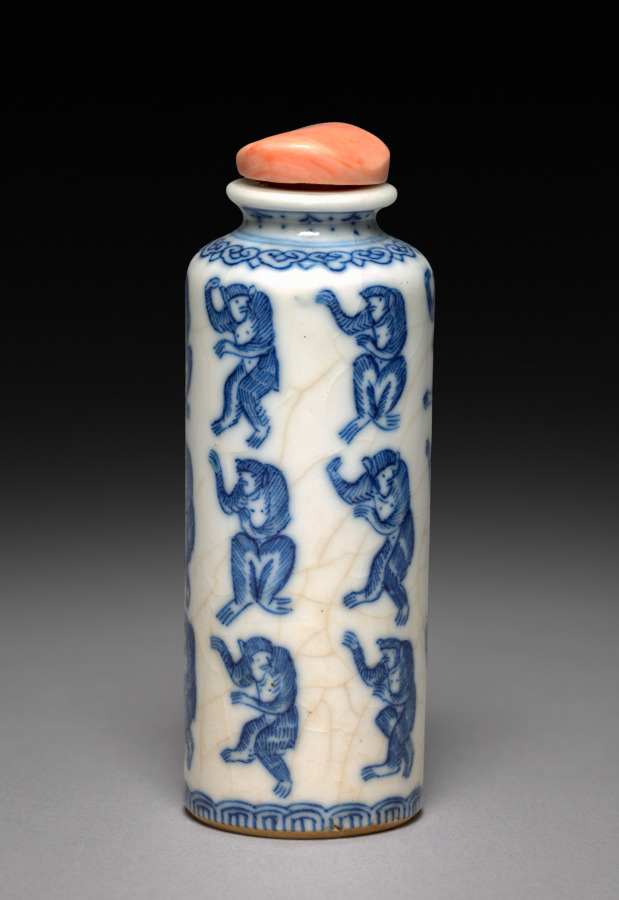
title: Snuff Bottle with Stopper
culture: China, Jiangxi Province, Jingdezhen kilns, Qing dynasty (1644–1911), Yongzheng mark and reign (1723–35)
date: 1723–35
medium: porcelain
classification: Ceramic